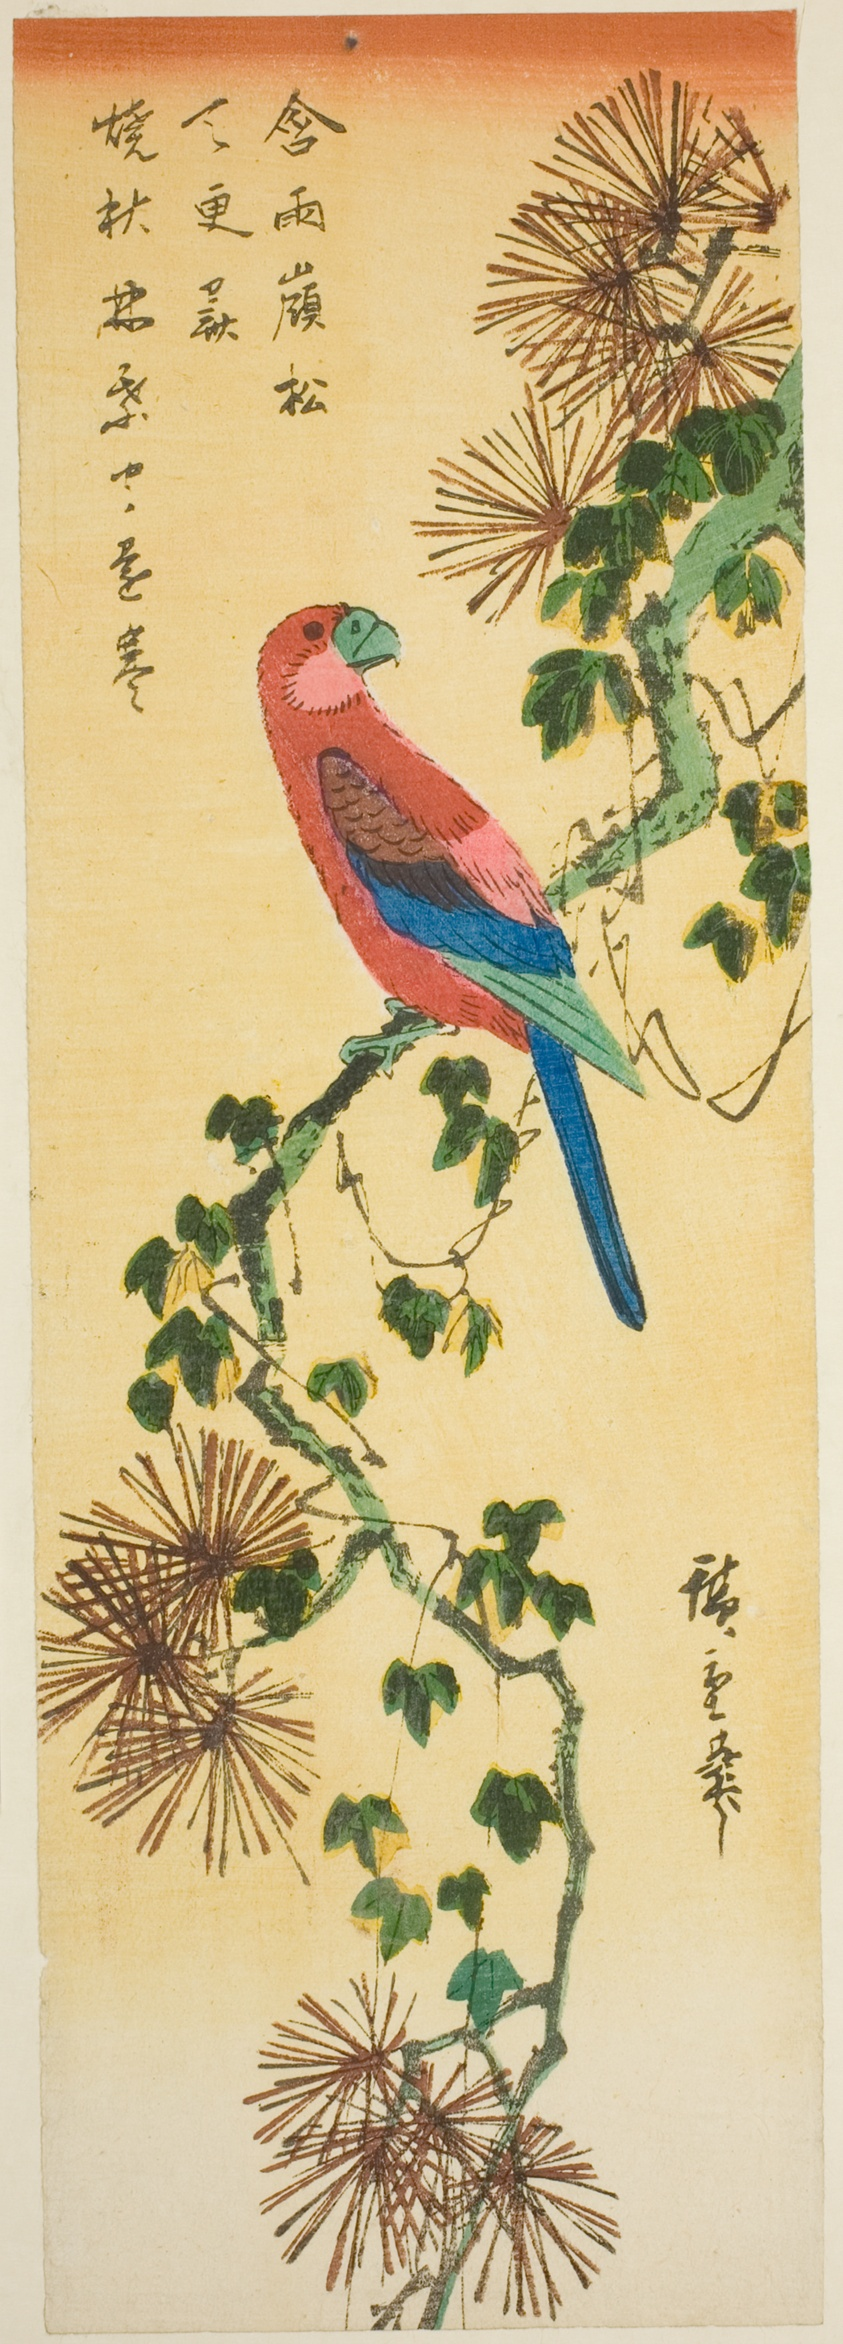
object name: Print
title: Macaw on ivy-covered pine branch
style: Japanese (culture or style)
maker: Utagawa Hiroshige 歌川 広重; Japanese, 1797-1858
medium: Color woodblock print; aitanzaku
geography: Japan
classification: woodblock print; print; asian art